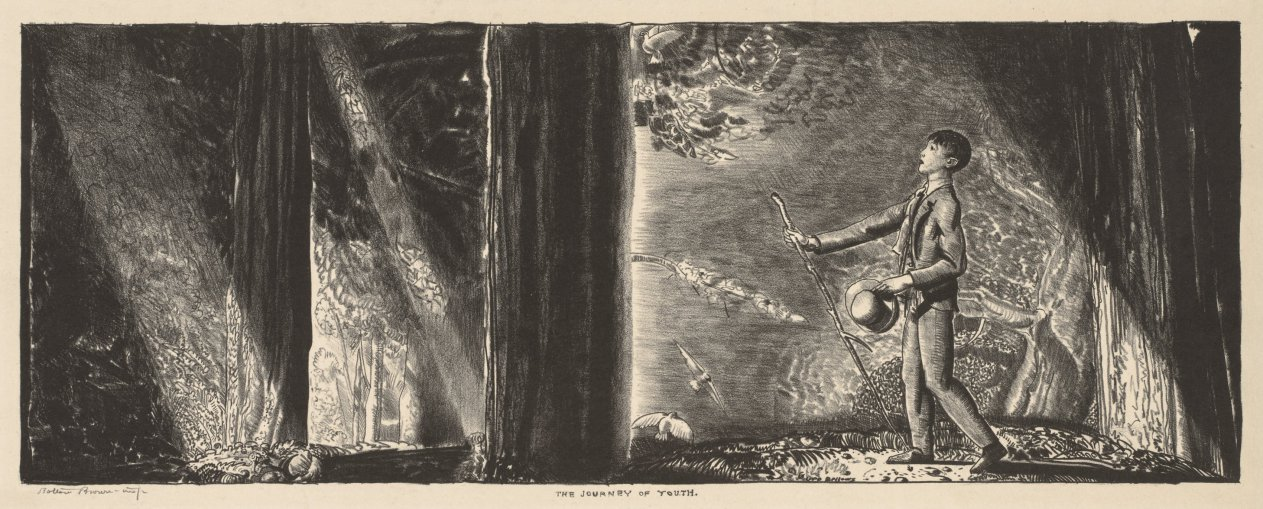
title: The Journey of Youth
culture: America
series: 11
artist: George Bellows (American, 1882–1925)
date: 1923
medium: lithograph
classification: Print